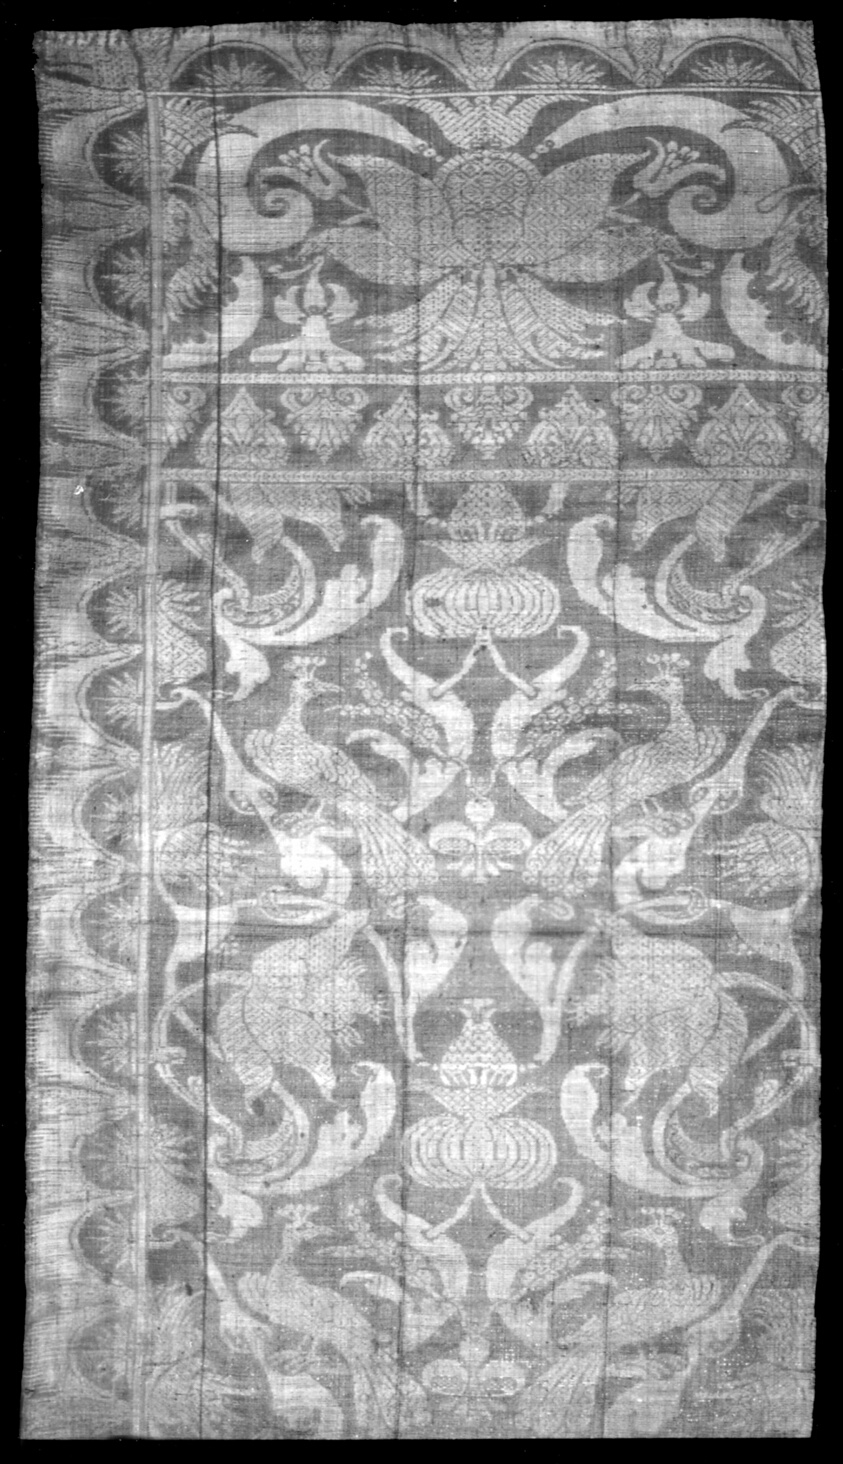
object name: Textile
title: Panel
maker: Italy or Spain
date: 1601/25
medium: Silk and silver gilt strips, plain weave with supplementary patterning wefts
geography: Italy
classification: textile; weaving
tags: insects